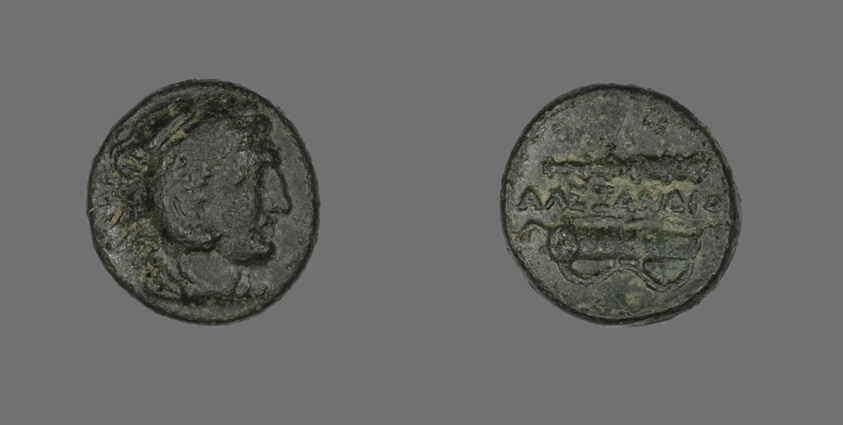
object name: Coin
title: Coin Depicting the Hero Herakles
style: greek, ancient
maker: Greek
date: 336-323 BCE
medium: Bronze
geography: Ancient Greece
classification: coin; ancient art